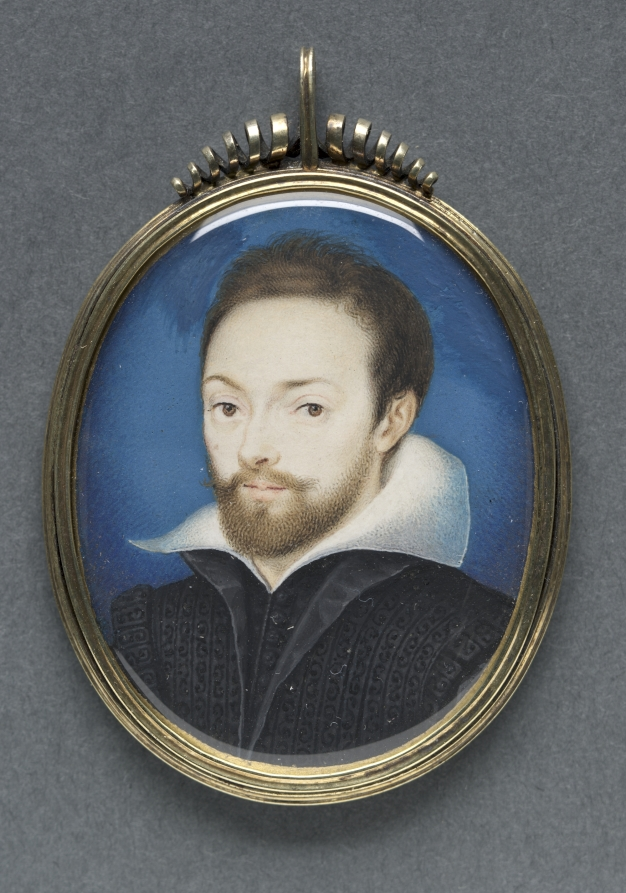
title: Portrait of a Man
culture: England, late 16th-early 17th century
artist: circle of Isaac Oliver (French, c. 1565–1617)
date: c. 1615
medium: watercolor on card in a later silver gilt frame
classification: Portrait Miniature